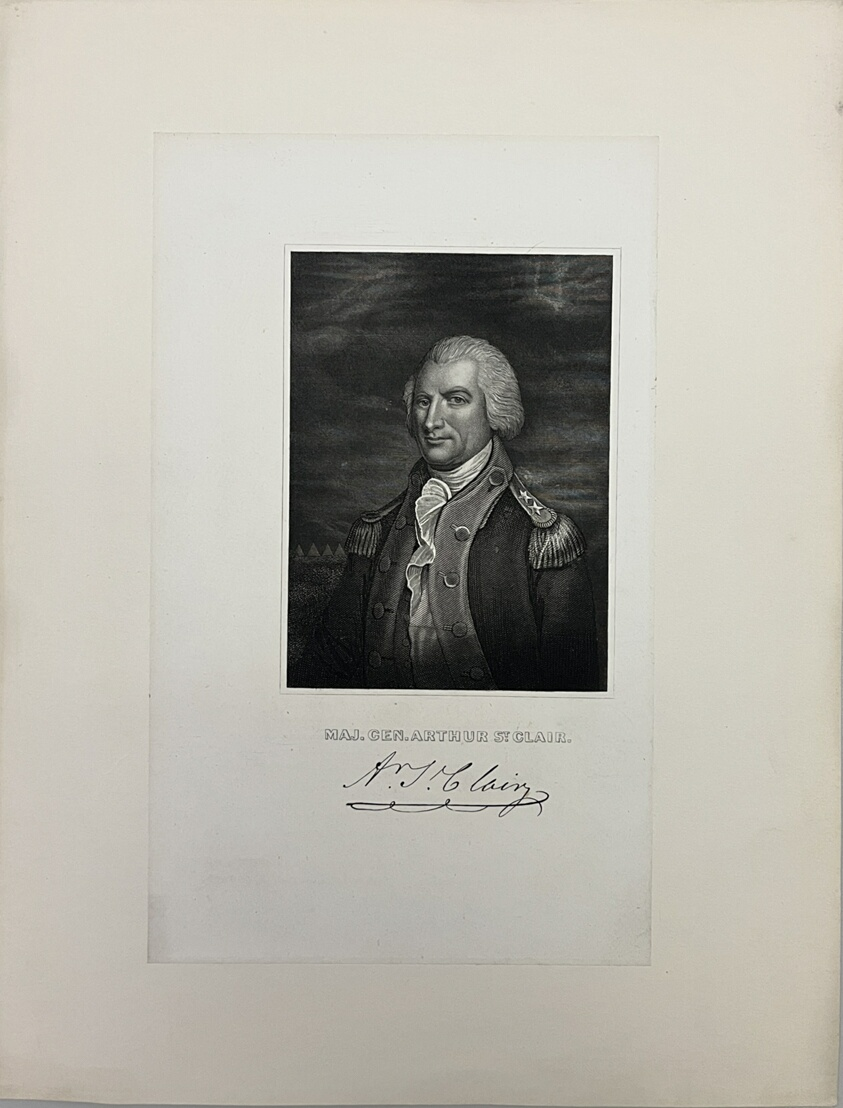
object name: Print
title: Major General Arthur St. Clair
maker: Artist Unknown (Likely American, 19th century); after Edward Wellmore (American, active mid-19th century); after James Barton Longacre (American, 1794-1869); after Charles Wilson Peale (American, 1741-1827)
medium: Etching on paper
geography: United States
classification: reproduction; print; prints and drawing